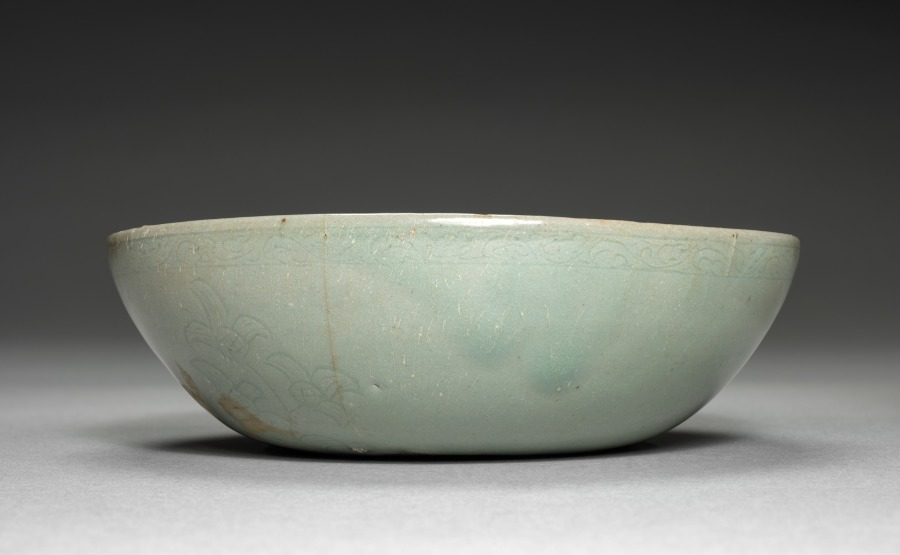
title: Dish with Incised Floral Design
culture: Korea, Goryeo dynasty (918–1392)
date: 1100s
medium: glazed porcelain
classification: Ceramic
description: Celadon wares used for everyday such as this dish were among the most common burial objects in tombs during the Goryeo period (918–1392). Furnishing tombs with an elaborate assemblage of objects was believed to honor and comfort the newly dead. Generally, Goryeo tombs were left untouched until the late 1800s. During the colonial period (1910–45), however, Japanese archaeologists competitively excavated the tombs located in Kaeseong, the former capital of the Goryeo period, and these wares soon became available for Japanese and Western collectors.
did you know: The translucent greenish and bluish glaze of Goryeo celadons, shown in this vase, is the result of distinctive small and long Korean kilns, which maintained a low oxygen saturation with a high level of carbon dioxide.